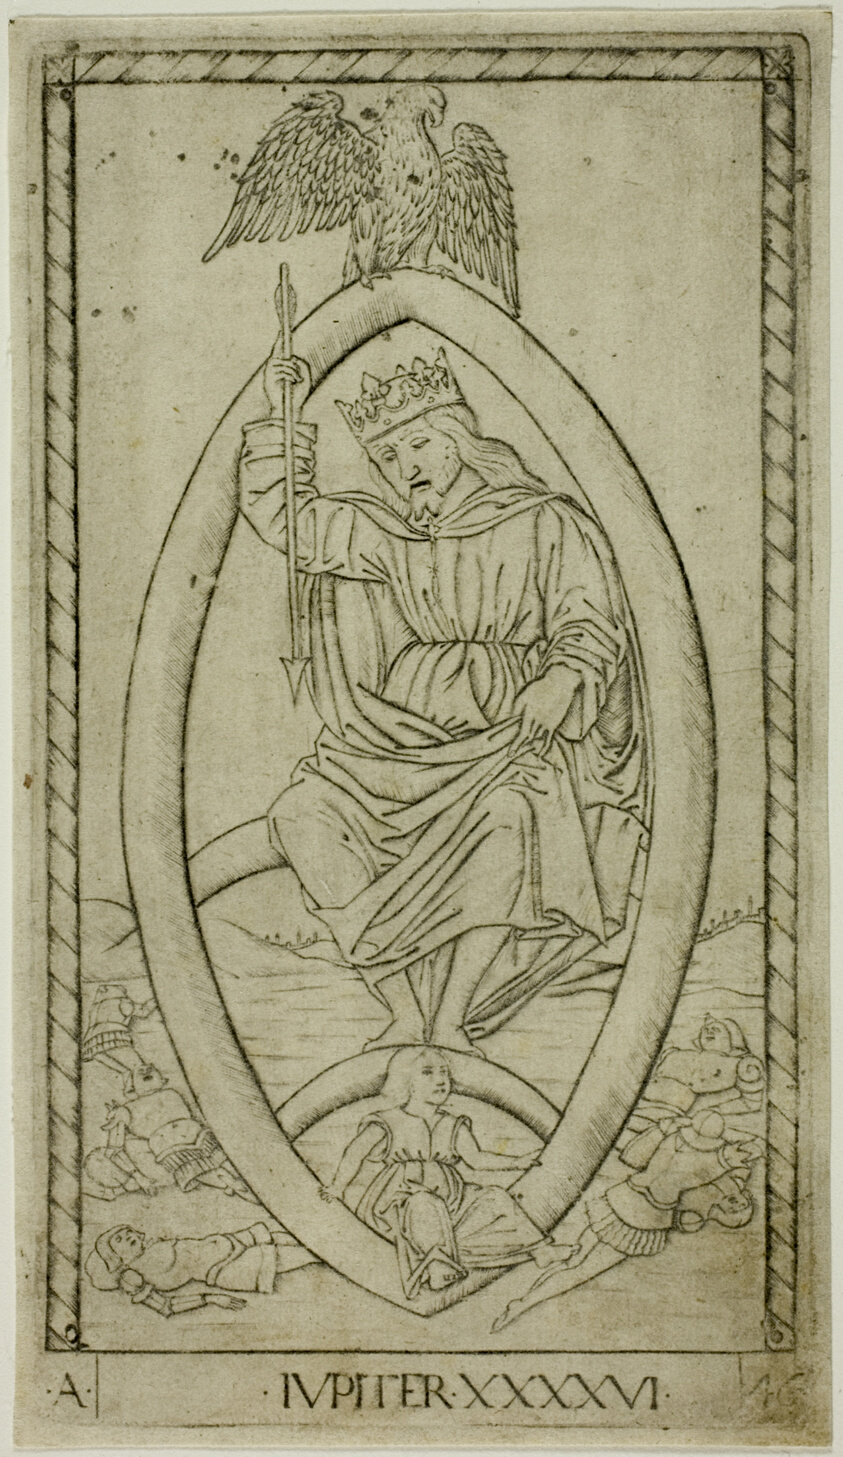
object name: Print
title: Jupiter, plate 46 from Planets and Spheres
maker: Master of the E-Series Tarocchi (Italian, active c. 1465)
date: c. 1465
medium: Engraving on paper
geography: Italy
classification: engraving; print; prints and drawing